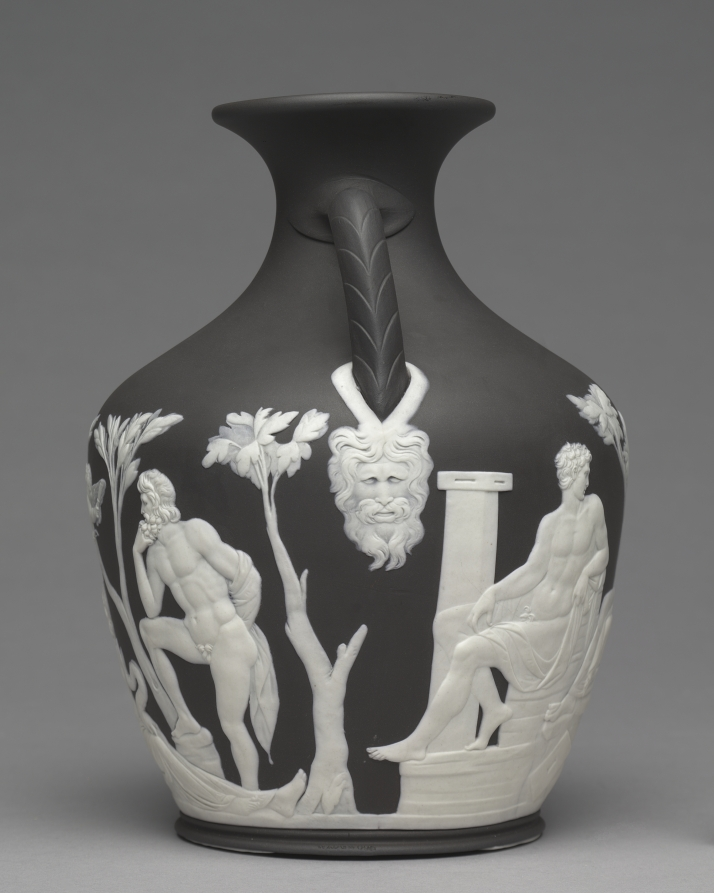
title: Portland Vase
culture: England, Staffordshire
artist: Josiah Wedgwood and Sons (Britain, Staffordshire, est. 1759)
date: c.1790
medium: jasperware with applied decoration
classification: Ceramic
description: The original Portland Vase is a Roman antiquity, made of dark-blue glass, dating from the first century AD. Such a rare archaeological find fascinated aristocratic collectors and artists alike, and eventually the vase came into the hands of the 3rd Duke of Portland in the 1780s. Around 1790 the duke lent the vase to the potter Josiah Wedgwood to make exact replicas in ceramic, of which the Cleveland example is one of the first editions. Eventually, the 4th Duke of Portland deposited the original Roman vase in the British Museum, where it resides today.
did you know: While the scene depicted here is not known for certain, many scholars believe that the Portland Vase portrays the wedding of Peleus and Thetis from Greek mythology.